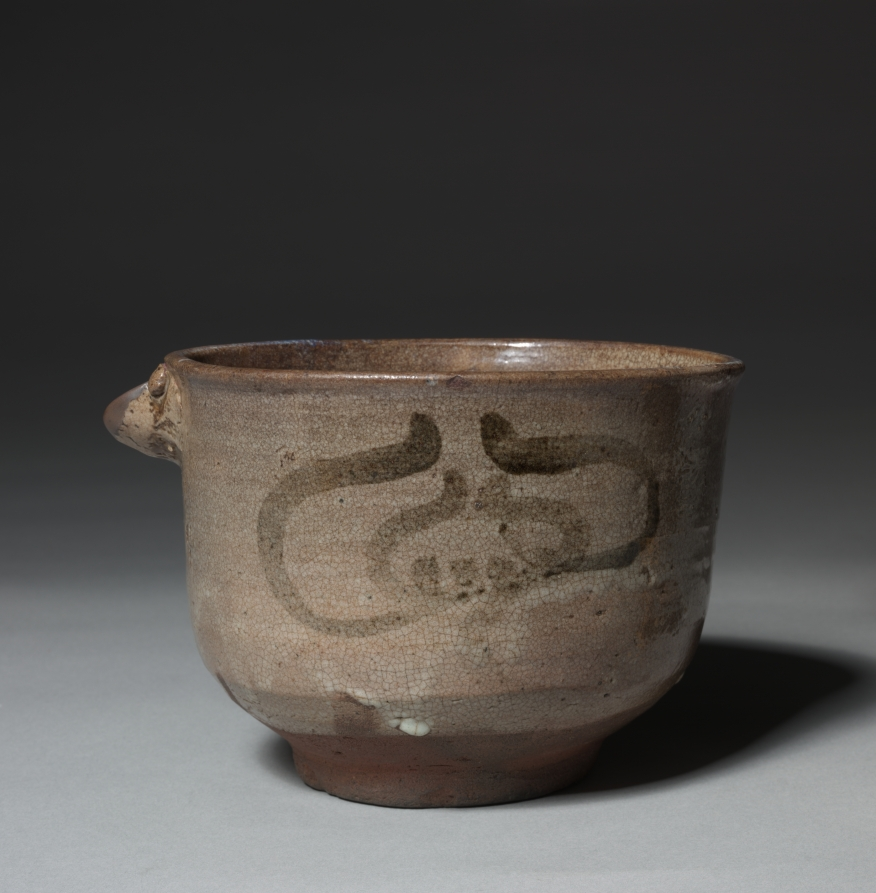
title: Spouted Bowl with Flower Design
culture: Japan, Momoyama period (1573–1615)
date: late 1500s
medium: glazed stoneware with slip decoration (Karatsu ware)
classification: Ceramic